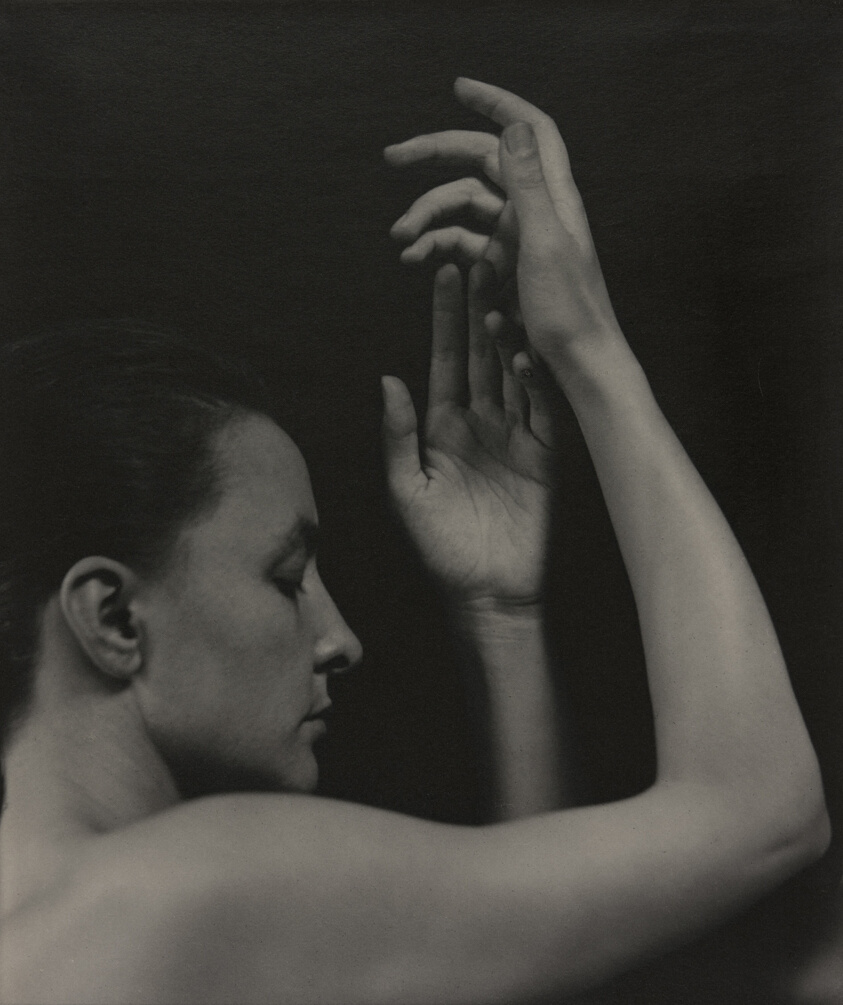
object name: Photograph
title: Georgia O'Keeffe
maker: Alfred Stieglitz (American, 1864–1946)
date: 1919/20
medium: Platinum print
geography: United States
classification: platinum print; photographic process; photography; photograph